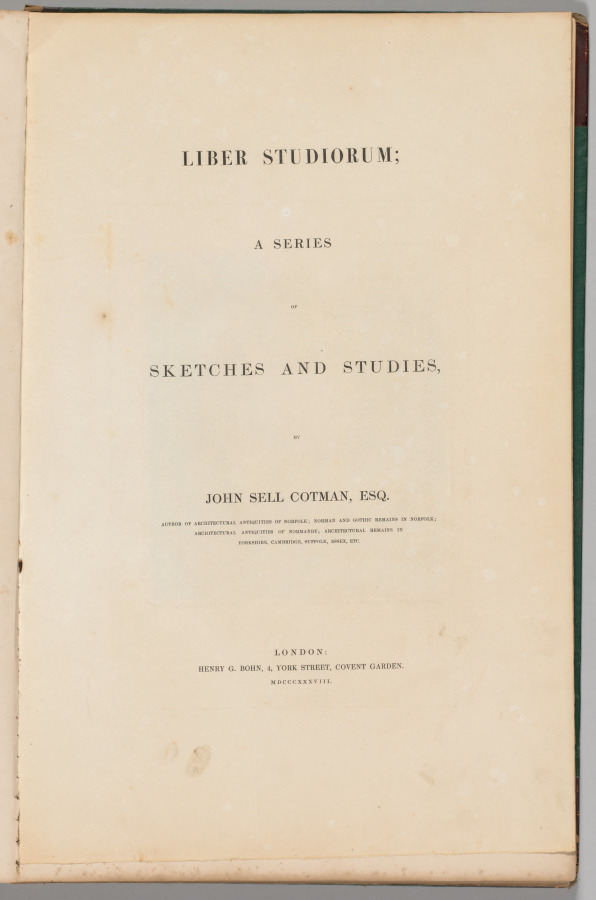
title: Liber Studiorum: Title Page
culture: England, 19th century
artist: John Sell Cotman (British, 1782–1842)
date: 1838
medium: Engraved text on wove paper, from a bound volume containing 48 plates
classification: Bound Volume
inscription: LIBER STUDIORUM; / A SERIES / OF / SKETCHES AND STUDIES, / BY / JOHN SELL COTMAN, ESQ. / AUTHOR OF ARCHITECTURAL ANTIQUITIES OF NORFOLK; NORMAN AND GOTHIC REMAINS IN NORFOLK; ARCHITECTURAL ANTIQUITIES OF NORMANDY; ARCHITECTURAL REMAINS IN YORKSHIRE, CAMBRIDGE, SUFFOLK, ESSEX, ETC. / LONDON: HENRY G. BOHN, 4, YORK STREET, COVENT GARDEN. / MDCCCXXXVIII